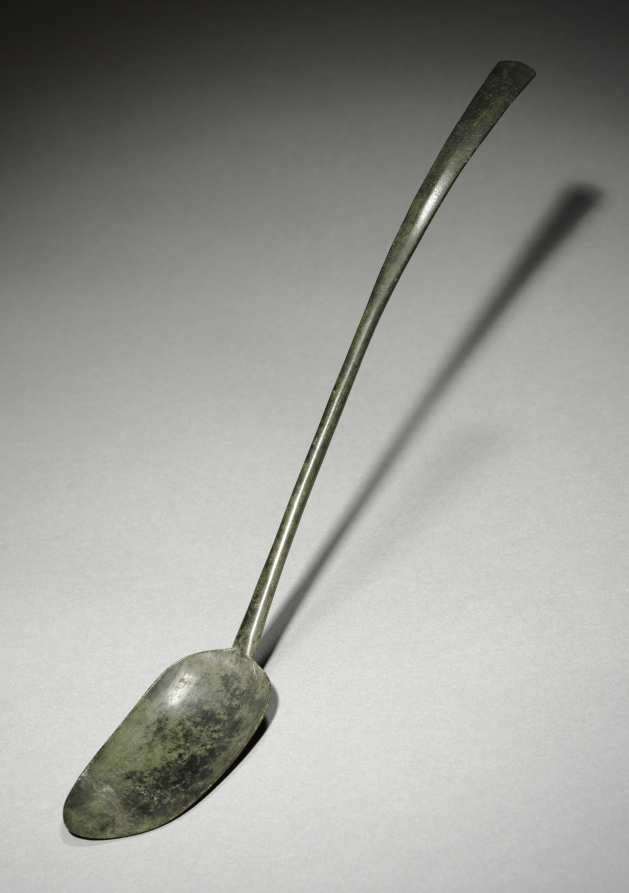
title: Spoon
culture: Korea, Goryeo dynasty (918–1392)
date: 918–1392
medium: silver bronze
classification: Metalwork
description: Celadons, spoons, seals, and bronze mirrors were the most common burial objects in tombs during the Goryeo period (918–1392). Furnishing tombs with an elaborate assemblage of objects was believed to honor and comfort the newly dead. Generally, Goryeo tombs were left untouched until the late 19th century. During the colonial period (1910–45), however, Japanese archaeologists hastily excavated the tombs located in Kaeseong, the former capital of the Goryeo period. Scholars recently have proposed that toward the end of the 14th century, Koreans enjoyed meat-based soups more than any other dishes, explaining why many more spoons than chopsticks were buried in tombs.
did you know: Bronze spoons are the most common burial item. Scholars have proposed that toward the end of the 14th century, Koreans enjoyed meat-based soups more than any other dishes, explaining why spoons became common household items as well as burial goods.